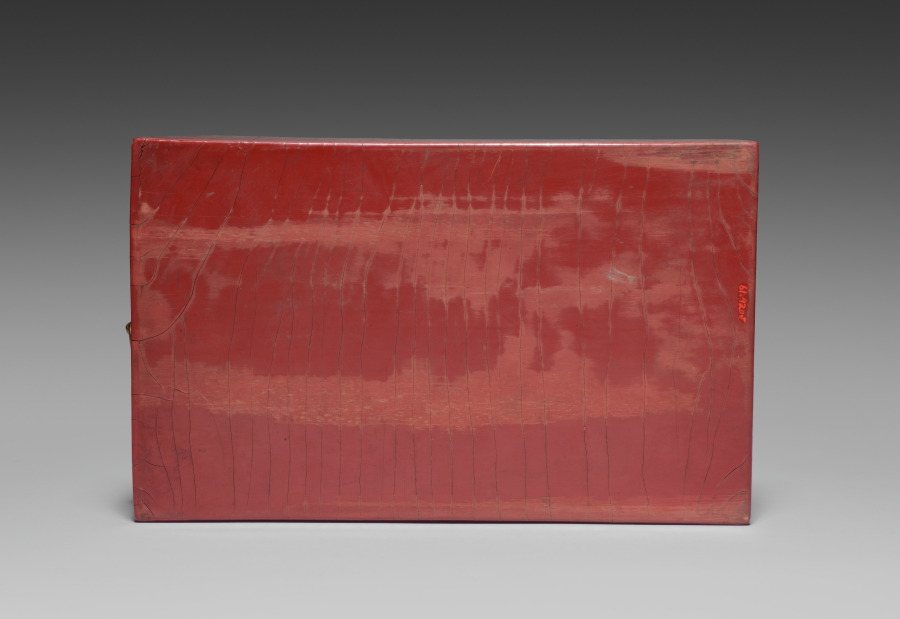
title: Drawer for a Tihong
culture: China, Ming dynasty (1368-1644), Wanli reign (1572-1620)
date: 1585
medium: carved cinnabar lacquer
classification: Lacquer